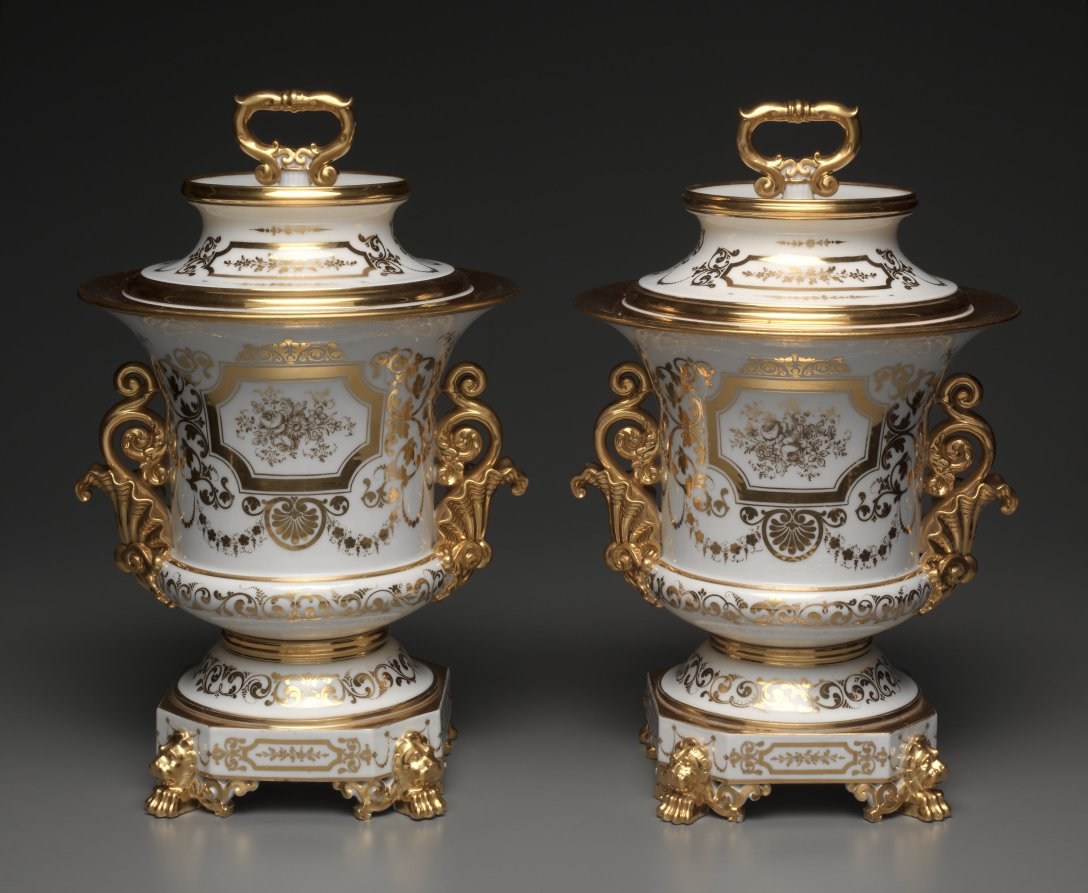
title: Pair of Covered Ice Cream Pails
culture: France, Paris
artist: Factory of Jacob-Petit (French, 1830–1865)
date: c. 1840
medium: gilt porcelain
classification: Ceramic